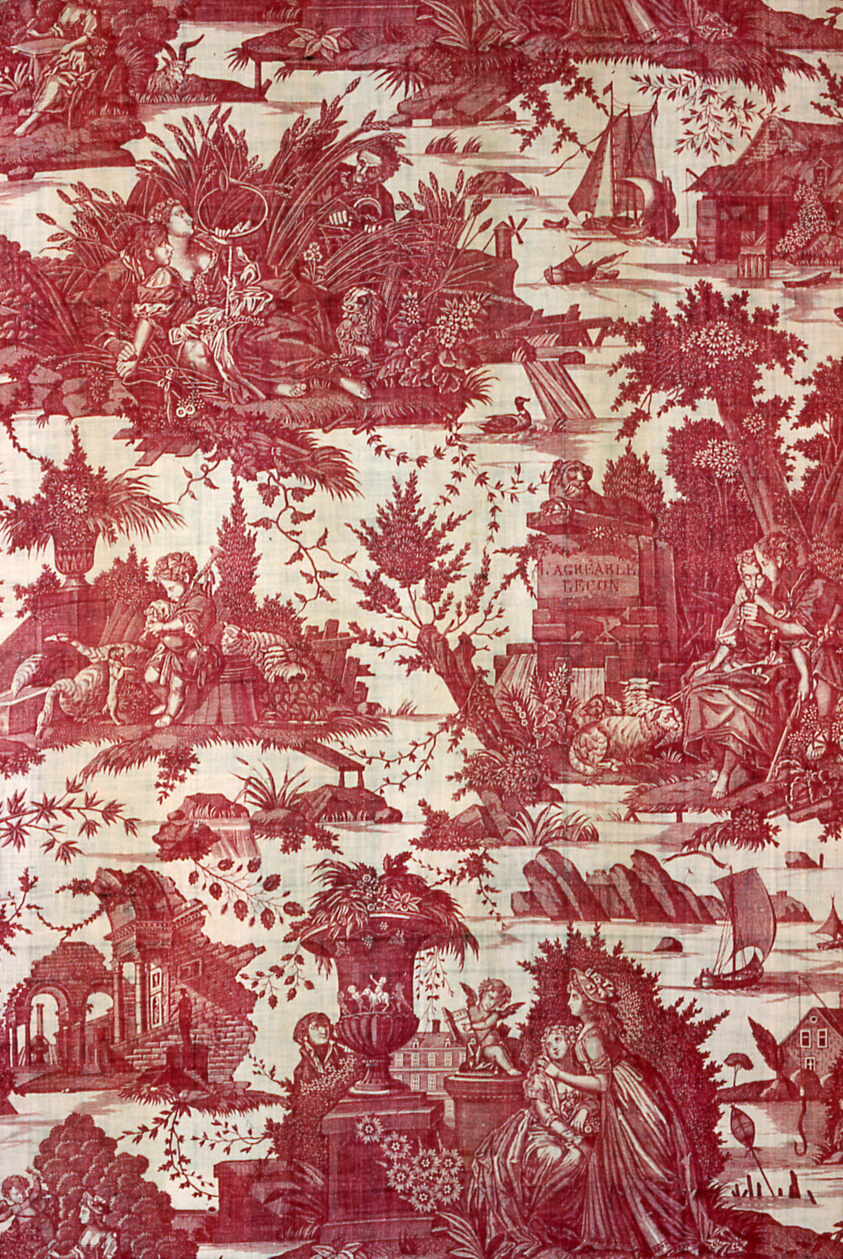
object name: Textile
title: L'Agréable leçon (The Pleasant Lesson) (Furnishing Fabric)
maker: Engraved by Francois Anotoine Aveline (French, 1718-1787) and others after Francois Boucher (French, 1703-1770); Manufactured by Petitpierre Freres & Cie. (French, 1760- 1791); France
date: 1788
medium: Cotton, plain weave; copperplate printed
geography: France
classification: textile; weaving - printed; furnishing textile